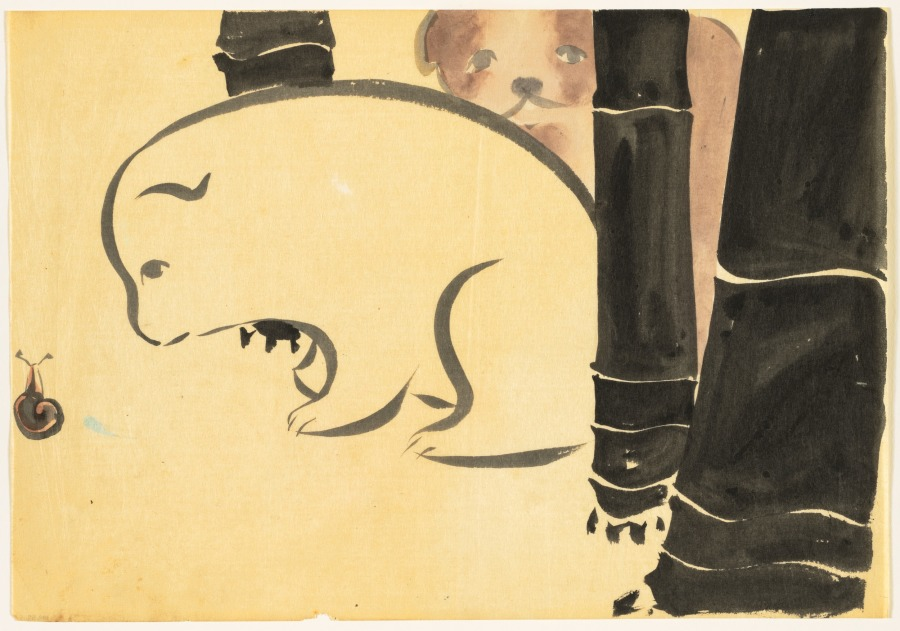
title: Flowers of a Hundred Worlds (Momoyogusa): Puppies (Enokoro)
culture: Japan, Meiji period (1868–1912)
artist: Kamisaka Sekka (Japanese, 1866–1942)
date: 1909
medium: ink and color on paper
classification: Drawing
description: Kamisaka Sekka made preparatory drawings for his Flowers of a Hundred Worlds series on tracing paper with ink and color. The freehand sketches are much looser than the finished, printed compositions.